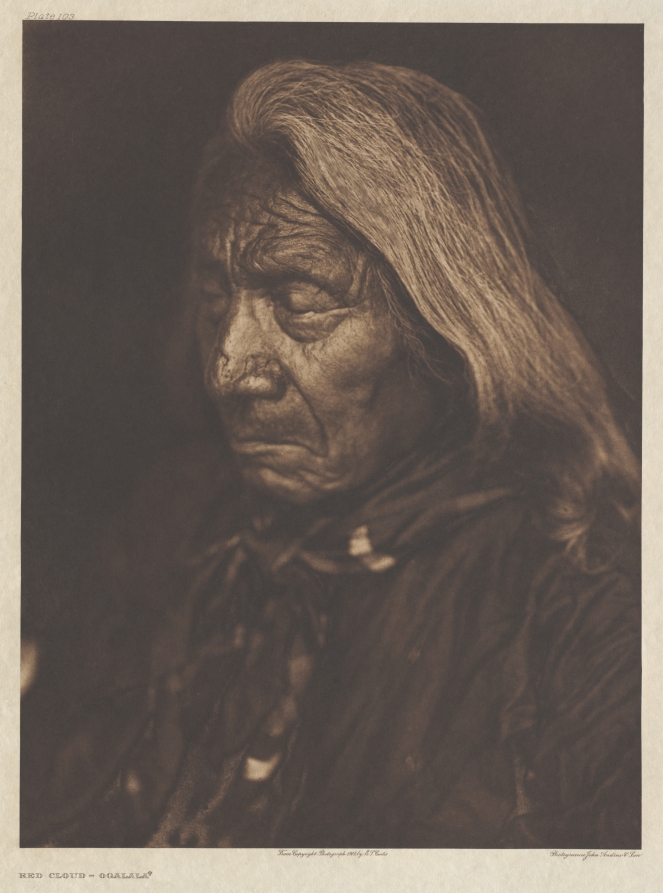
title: Portfolio III, Plate 103: Red Cloud-Ogalala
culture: America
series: The North American Indian: being a series of Portfolios picturing and describing the Indians of the United States, the Dominion of Canada, and Alaska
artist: Edward S. Curtis (American, 1868–1952)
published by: The University Press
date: 1905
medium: photogravure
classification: Portfolio